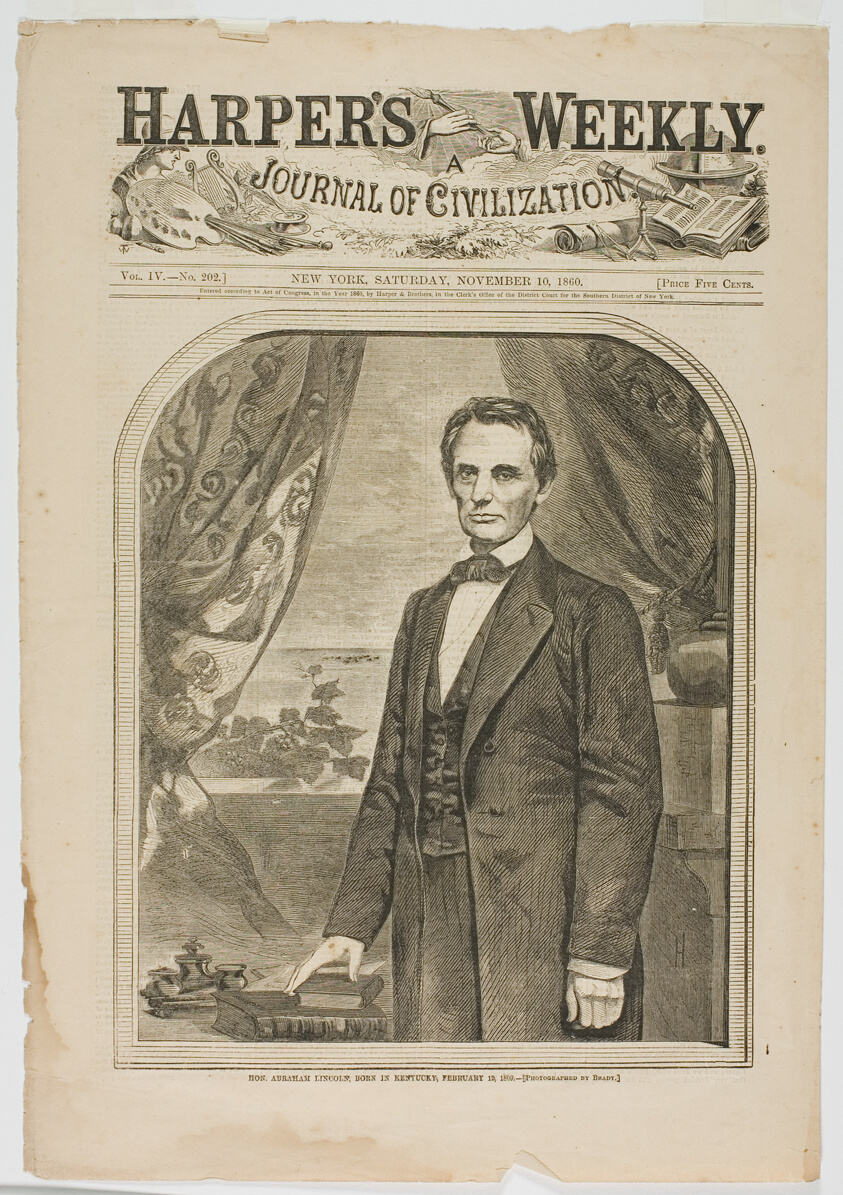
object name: Print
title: Hon. Abraham Lincoln, Born in Kentucky, February 12, 1809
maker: Winslow Homer (American, 1836-1910); published by Harper's Weekly (American, 1857-1916)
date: published November 10, 1860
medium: Wood engraving on paper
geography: United States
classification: wood engraving; print; prints and drawing